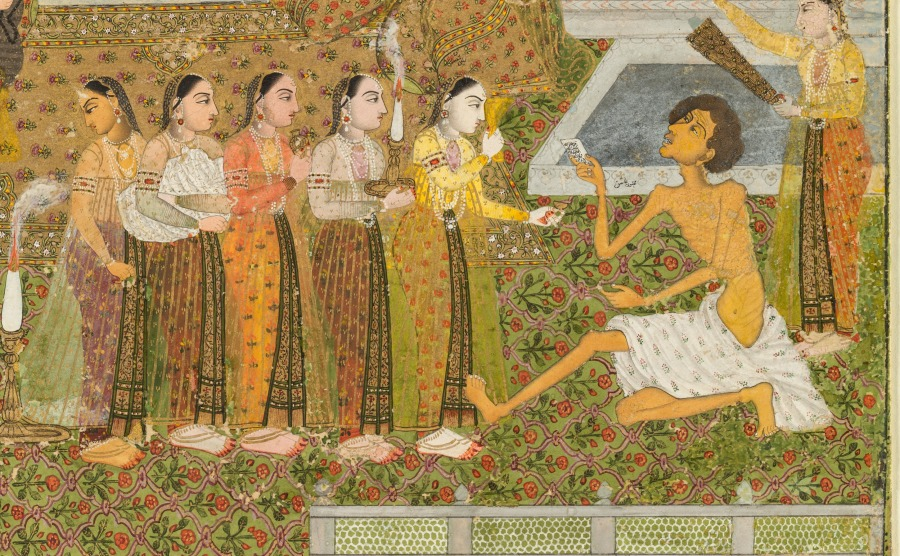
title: Lovers and beloveds: A composite of scenes from Persian, Urdu, and Sanskrit literature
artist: Chitarman II (Indian, c. 1680–с. 1750)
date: c. 1735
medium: Gum tempera and gold on paper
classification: Painting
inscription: Persian inscriptions throughout, in nasta‘liq script: Top left: The celebrated lover Ranjha; Top right, above awning: The notable ladies of the city falling into a swoon having caught sight of Joseph’s beauteous countenance; Top center, on pillar beneath canopy: The celebrated lover Vamiq; On another pillar, behind the woman’s head: The celebrated beloved ‘Azra; Upper left, on pillar: King Nala, the lover; Central figure with halo: The coming from the prison and sitting [in state] of the Lord Joseph the Prophet, with the women of the town cutting the palms of their hands and falling down unconscious; Left of center: [. . . cutting palms . . . wine cups fell from their hands . . . state of wonderment . . .]; Central pavilion at left: Sassi, the beloved the lover [Punnun]; Below central figure of Joseph: The stream of milk Shirin the beloved, weeping The death of Farhad, the lover; Lower right, in front of bearded man: Hafiz of Shiraz; Below his decanter: The stick of candy [referring to the woman with whom, according to popular lore, Hafiz was supposed to have fallen in love as a youth]; Behind the pavilion at right: Bride descending into a grave . . .; On the white railing to the left: Khwaja Bu Ali . . .; Bottom left: Queen Padmavati, the beloved, King Ratnasena, the lover; Bottom right: Majnun, the lover; On page held by Majnun: Say, “He is Allah, who is One, Allah the eternal refuge. He neither begets nor is born, Nor is there to Him any equivalent.” [Qur'an, chapter 112]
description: The figure of Joseph, identified by his halo, sits in the center near the top of this painting of heroes and heroines of ten different Persian, Urdu, and Sanskrit romances. The depicted scene occurs after Joseph has been purchased by Zulaykha in Egypt. Zulaykha, wishing to show him off to her friends and acquaintances, invites them to her home where she supplies oranges and knives. When the women see Joseph, they all are so distracted by his divine beauty that they accidentally cut their hands while peeling their oranges, but remain mesmerized by his appearance. The dramatic scene in the center is from the Persian romance of Khusrau and Shirin, in which Farhad, a stonecutter who loved Shirin, threw himself to his death from a mountaintop after hearing news of Shirin’s death, falsely sent to him from his rival Khusrau. The emaciated Majnun is in the lower right corner. Every vignette has been identified with a tiny Persian inscription.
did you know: Below the bearded poet Hafiz is the woman he loved; her name was Stick of Candy.